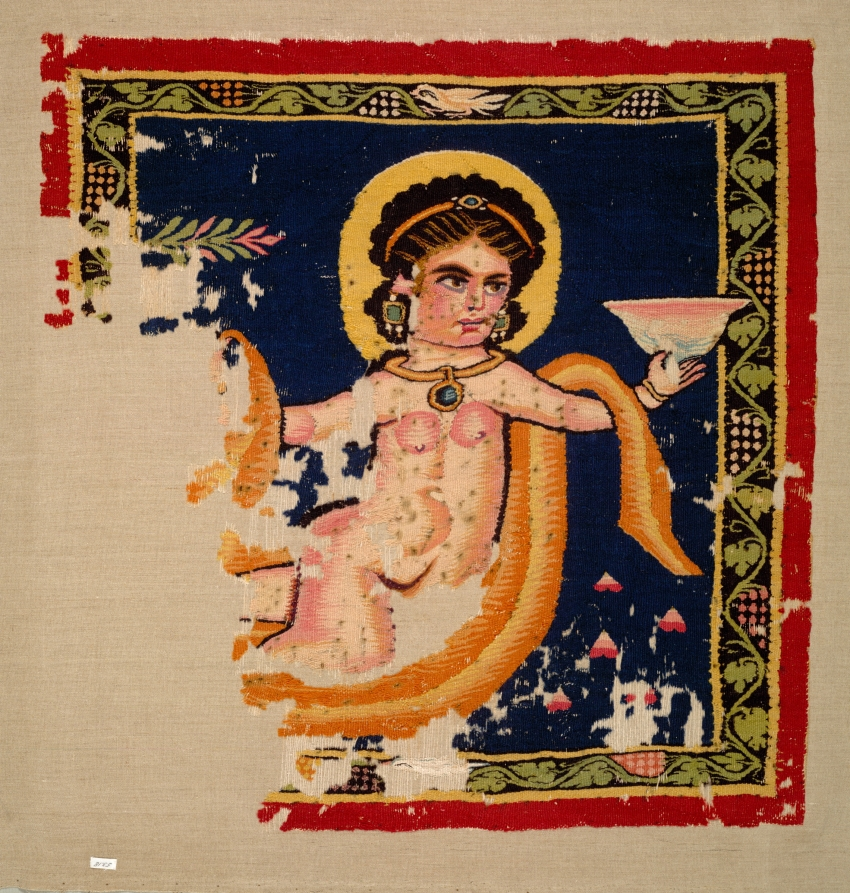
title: Nereid (Sea-Nymph) from a Hanging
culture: Byzantine Empire (Egypt)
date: late 300s–400s CE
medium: dyed wool, undyed linen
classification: Textile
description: The brilliant colors and complex design of this panel, likely one of several forming a tapestry, testify to its makers’ skill. Vines and birds frame a nereid, a mermaidlike mythological creature, against a dark blue ground. The weaver has aligned different-colored threads to create shading and special details. Blue threads representing water are integrated into the weaving of the glass bowl. Alternating pink and blue threads combine to create a smoky effect around the nereid’s eyes. Small spots across the surface are stable organic spores and fortunately do not affect the condition of this millennia-old textile.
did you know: Look closely at the eyeliner beneath the eye: it is formed by mixing two colors of thread, pink and blue.